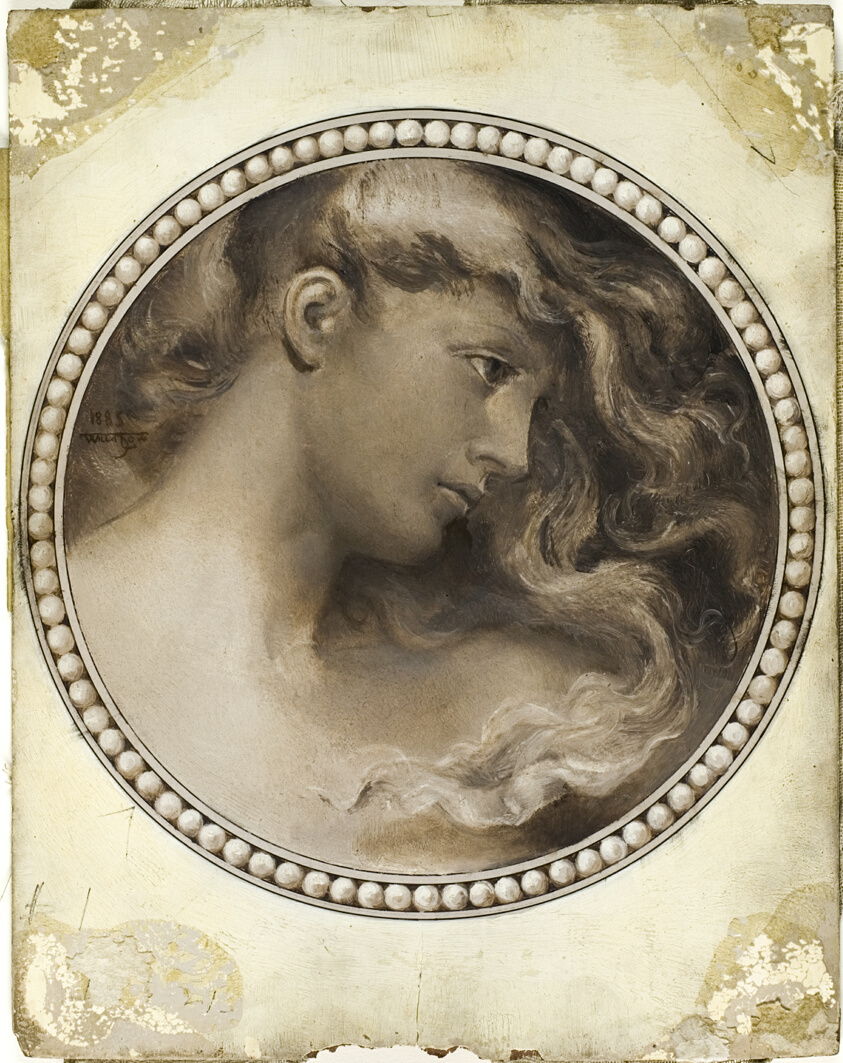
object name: Drawing and Watercolor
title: Lamia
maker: Will Hicock Low (American, 1853-1932)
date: 1885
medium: Brown and white gouache on wooden board, backed with fabric and paper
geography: United States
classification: gouache; prints and drawing; drawings (visual works)